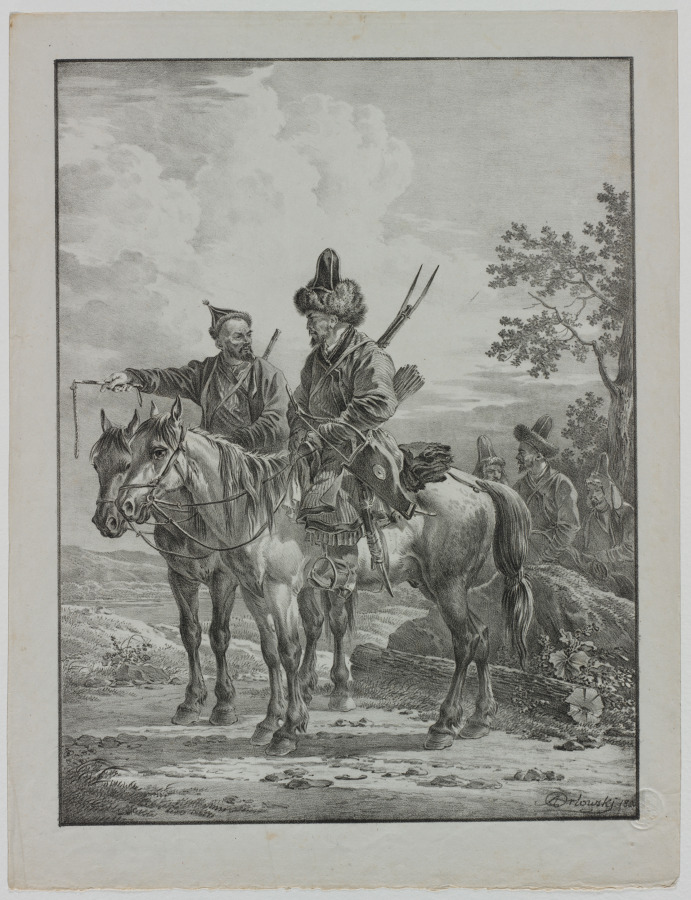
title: Tartars on Horseback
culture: Russia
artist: Aleksandr Orlowski (Russian, 1777–1832)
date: 1820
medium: lithograph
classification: Print